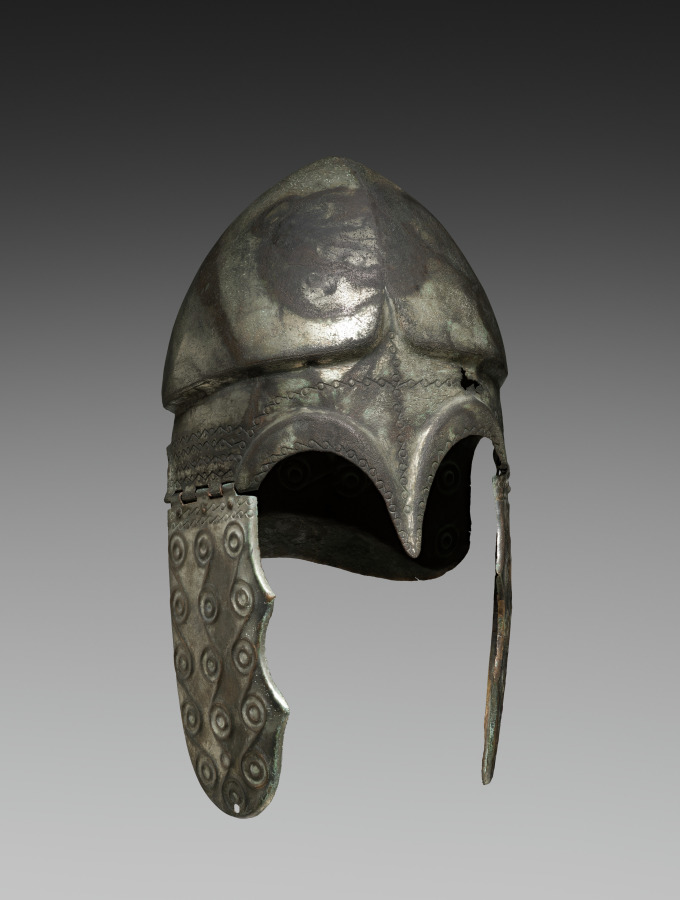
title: Chalcidian Helmet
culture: Greek (perhaps Black Sea area)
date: c. 350–200 BCE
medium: Tinned bronze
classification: Arms and Armor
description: Among ancient helmets, the Chalcidian type is varied, widespread, and comparatively unrestrictive, with relatively wide openings for the eyes and ears. This example, probably made in the Black Sea region or even further east, features a pointed noseguard, high carinated crown, molded brow ridge, and everted rear flange, plus large separately made hinged cheekpieces. The tinned bronze surface is almost silver in color, with extensive decoration including small incised linked scrolls and much larger embossed linked scrolls.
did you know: Although named for Chalcis, a city in Euboia, Chalcidean helmets were made across the Greek world.